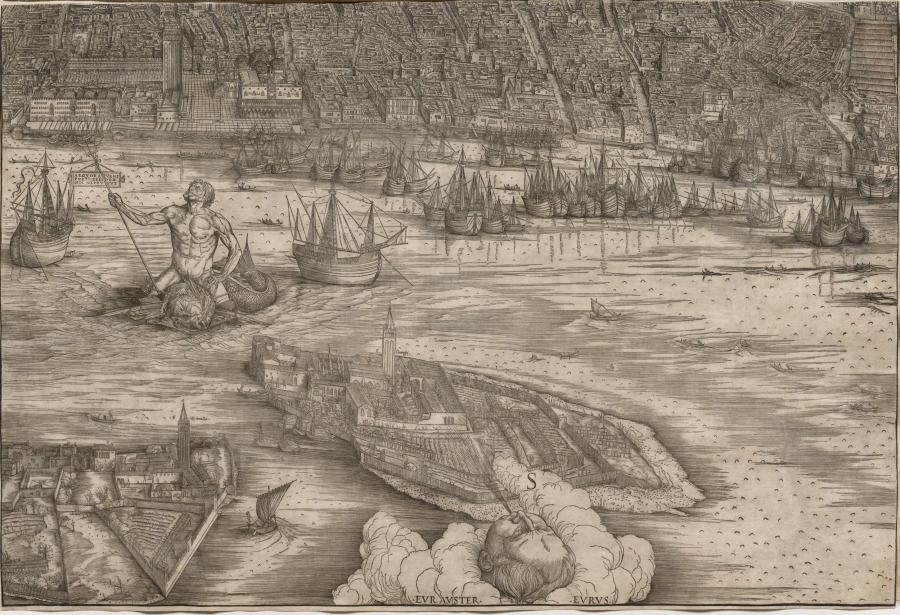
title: View of Venice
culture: Italy, early 16th Century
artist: Jacopo de' Barbari (Italian, c. 1460/70–c. 1516)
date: 1500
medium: woodcut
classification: Print